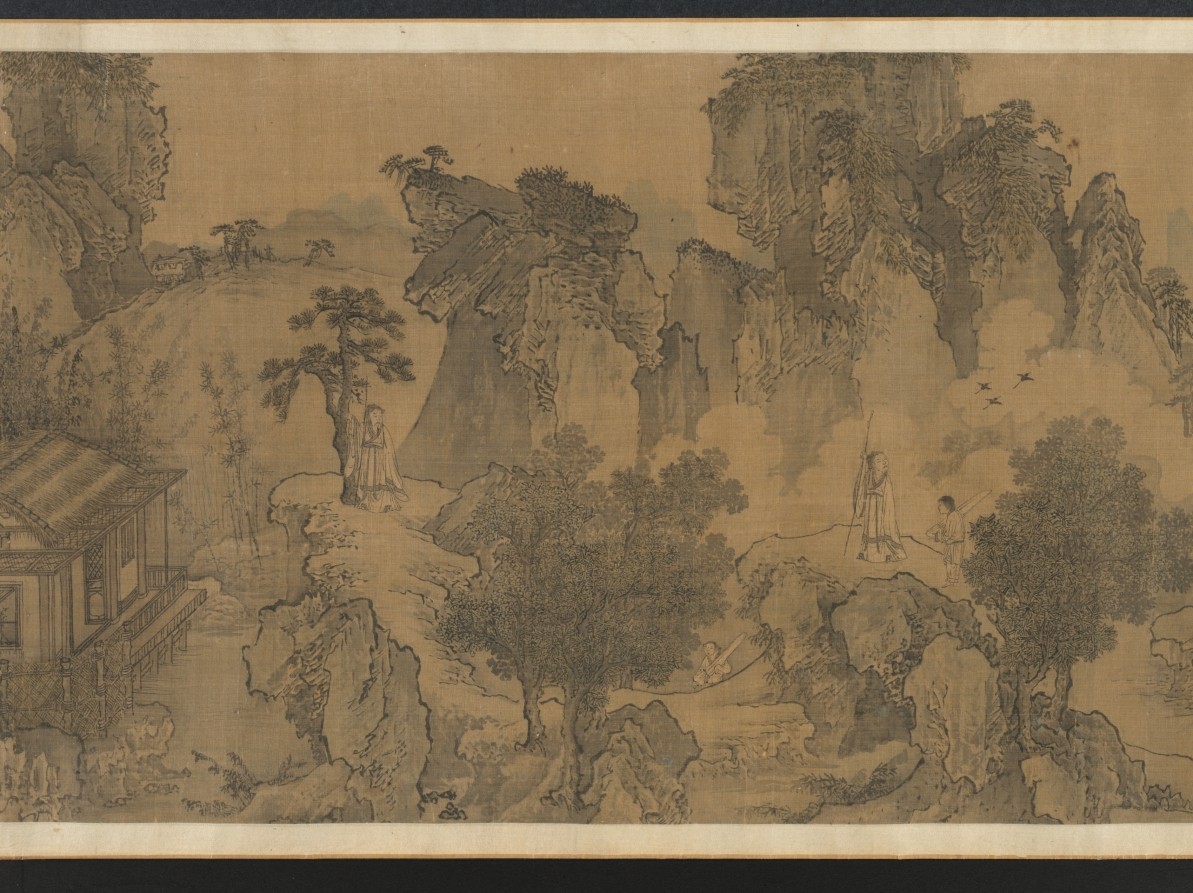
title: Tao Yuanming's Return Home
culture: China, Yuan dynasty (1271-1368)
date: 1300s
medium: Handscroll; ink and slight color on silk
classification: Painting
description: Tao Yuanming's revered poem "Return Home 歸去來辭 (Gui qu lai ci)" powerfully conveys his desire to leave bureaucratic life for the simplicity and authenticity of nature. This sentiment has deeply resonated with generations of Chinese scholars, making it a popular theme in paintings. This handscroll uses continuous narrative depicting Tao in multiple scenes from the poem. Starting on the right, the poet travels to his home. His children wait by the gate, while his wife pauses to tidy her hair before welcoming him. Then, free from the burdens of official service, Tao spends time in both nature and his cottage, where he can again enjoy wine, music, and books.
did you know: Poet Tao Yuanming 陶淵明 (c. 365–427 CE) returned to a secluded life instead of pursuing a civil service career.